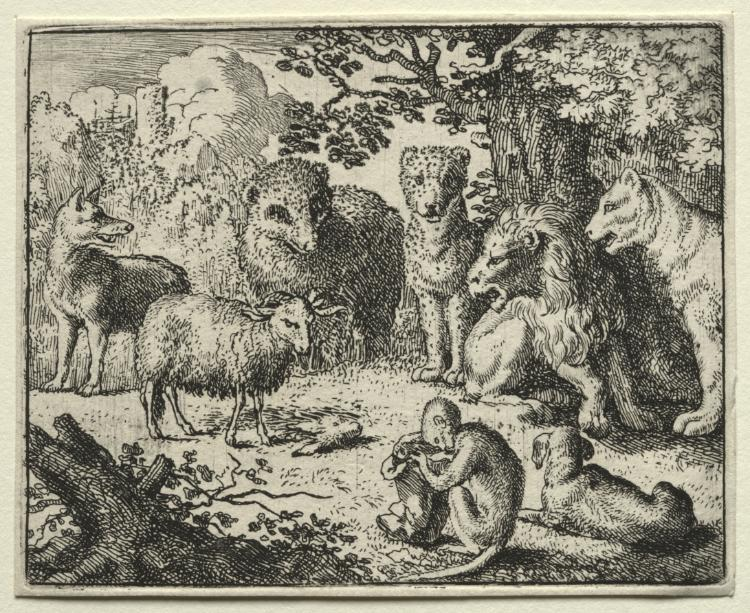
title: Reynard the Fox: The Arrival of the Packet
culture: Netherlands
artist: Allart van Everdingen (Dutch, 1621–1675)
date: 1650–75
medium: etching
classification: Print